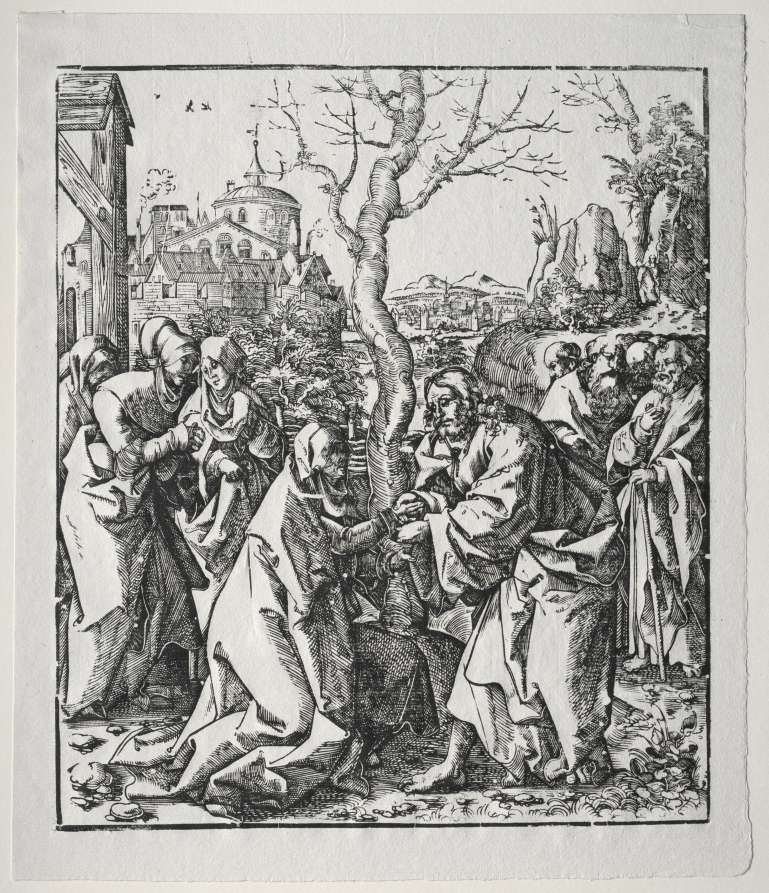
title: Christ Taking Leave of his Mother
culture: Germany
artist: Wolf Traut (German, c. 1486–1520)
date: after 1500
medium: woodcut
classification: Print